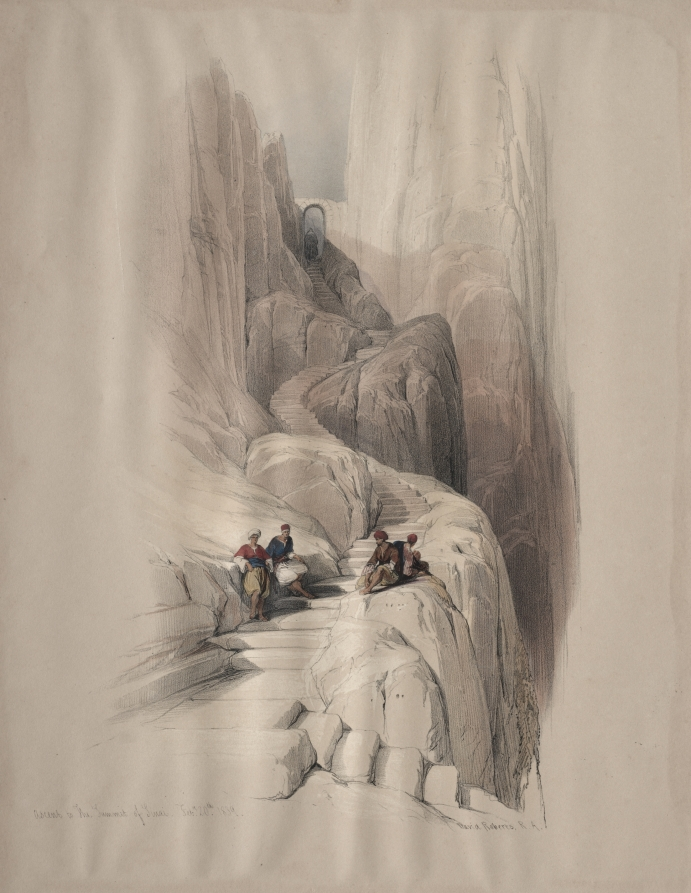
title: Ascent to the Summit of Sinai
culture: England, 19th century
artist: David Roberts (Scottish, 1796–1864)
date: 1839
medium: color lithograph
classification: Print